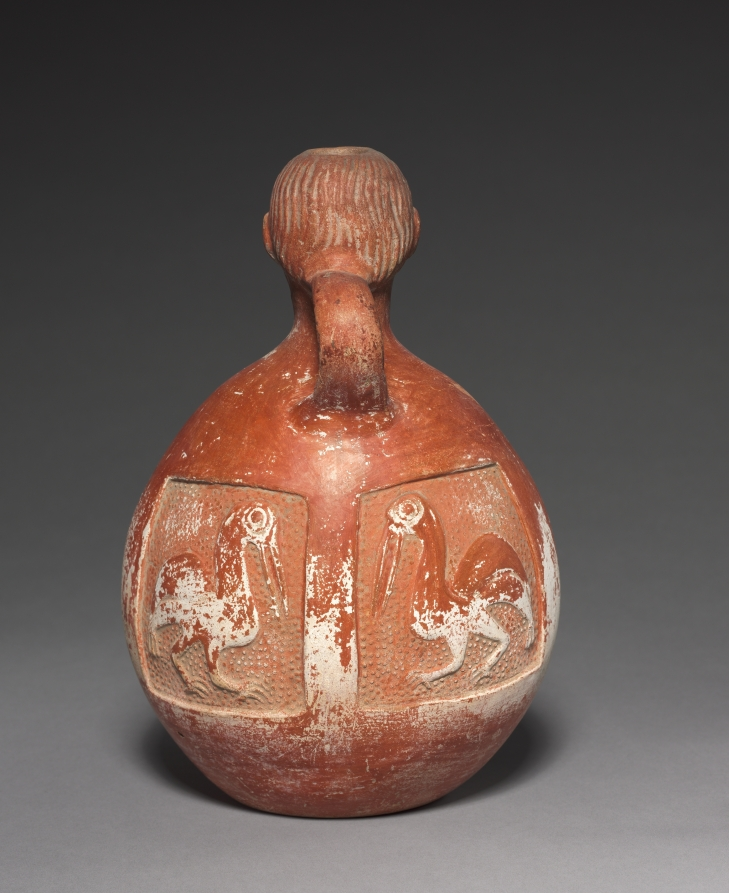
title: Urn or Jug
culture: Peru, 16th century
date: 1532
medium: pottery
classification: Ceramic